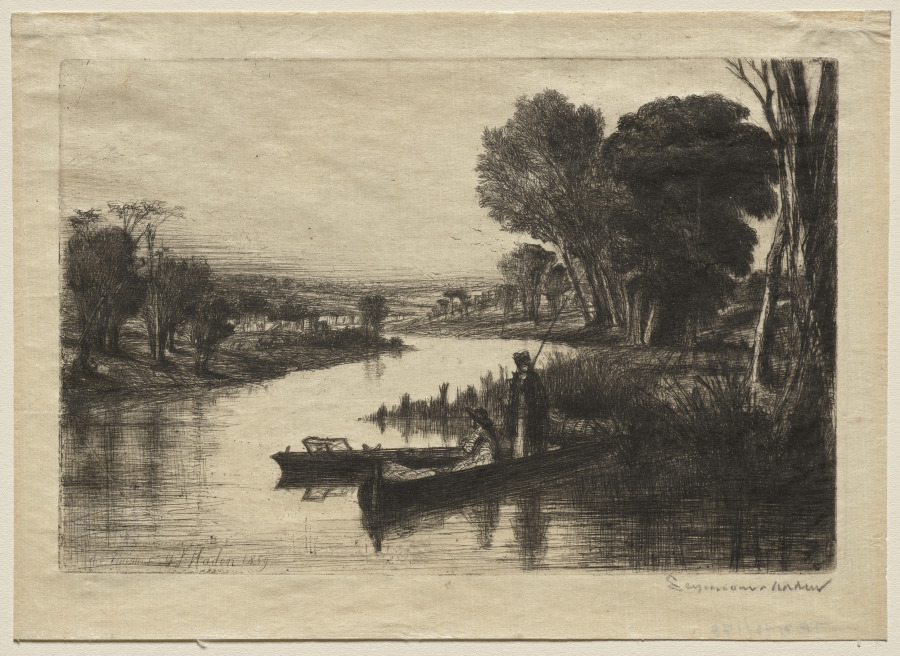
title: Thames Fishermen (First Plate)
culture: England, 19th century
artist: Francis Seymour Haden (British, 1818–1910)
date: 1859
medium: etching and drypoint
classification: Print